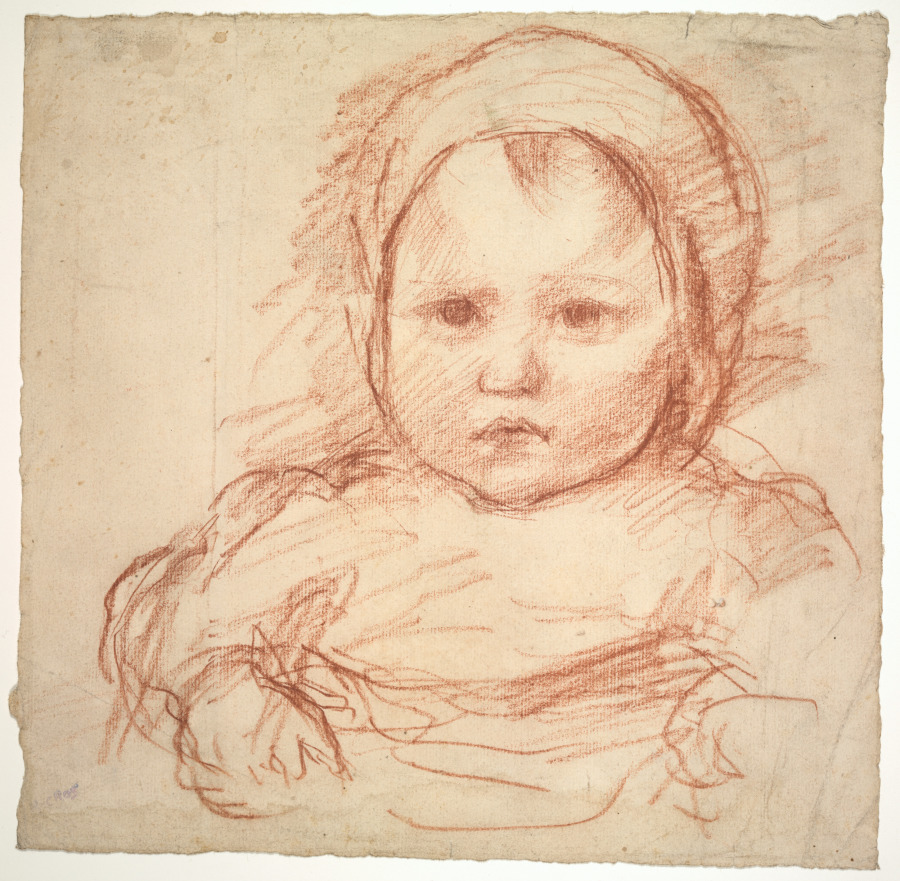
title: Portrait of an Infant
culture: France, 19th/20th century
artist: Henri Cros (French, 1840–1907)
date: 1800s-1900s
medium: sanguine on off-white laid paper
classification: Drawing